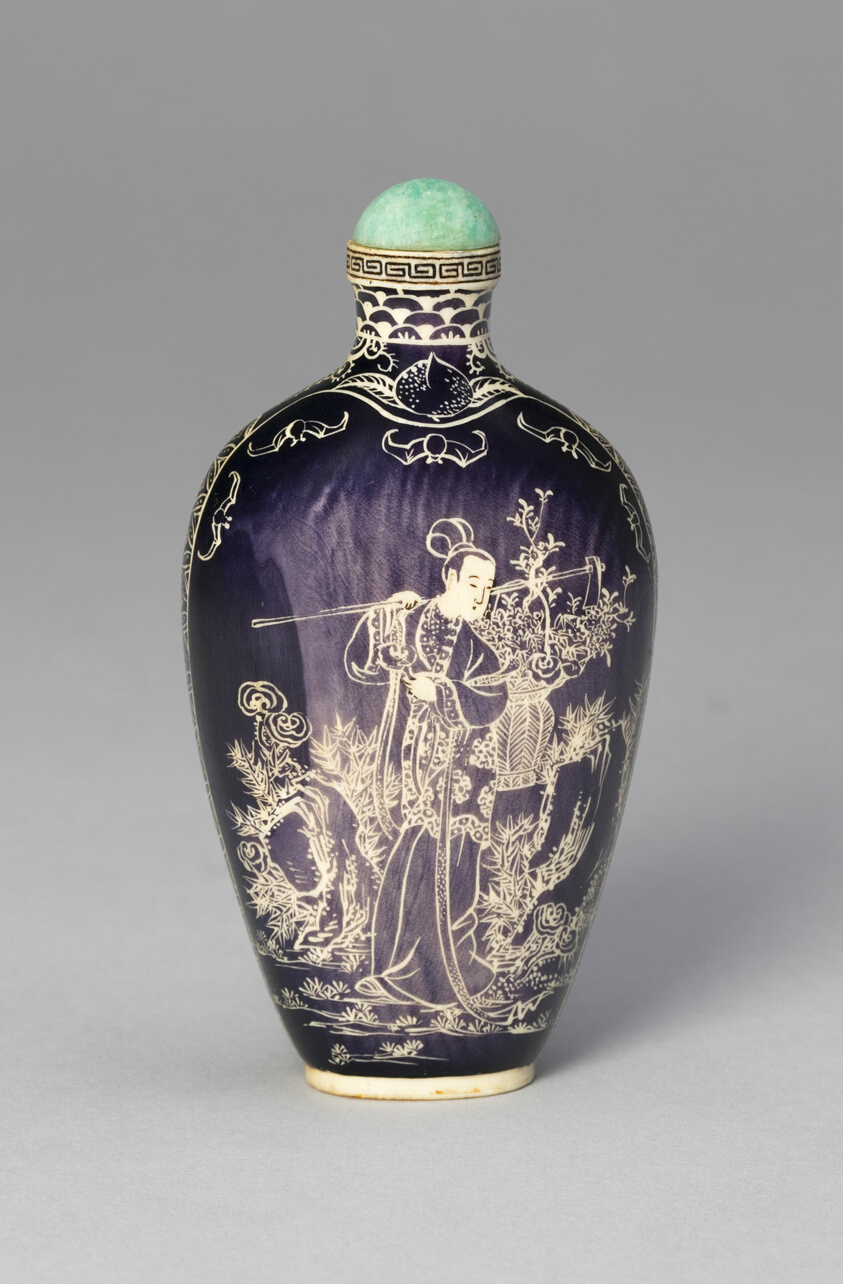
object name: Vessel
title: Snuff Bottle with the Immortal Magu Carrying a Basket of Flowers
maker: Japan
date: c. 1880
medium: Ivory with painted decoration in reserve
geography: Japan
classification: snuff bottle; ivory; asian art; vessel